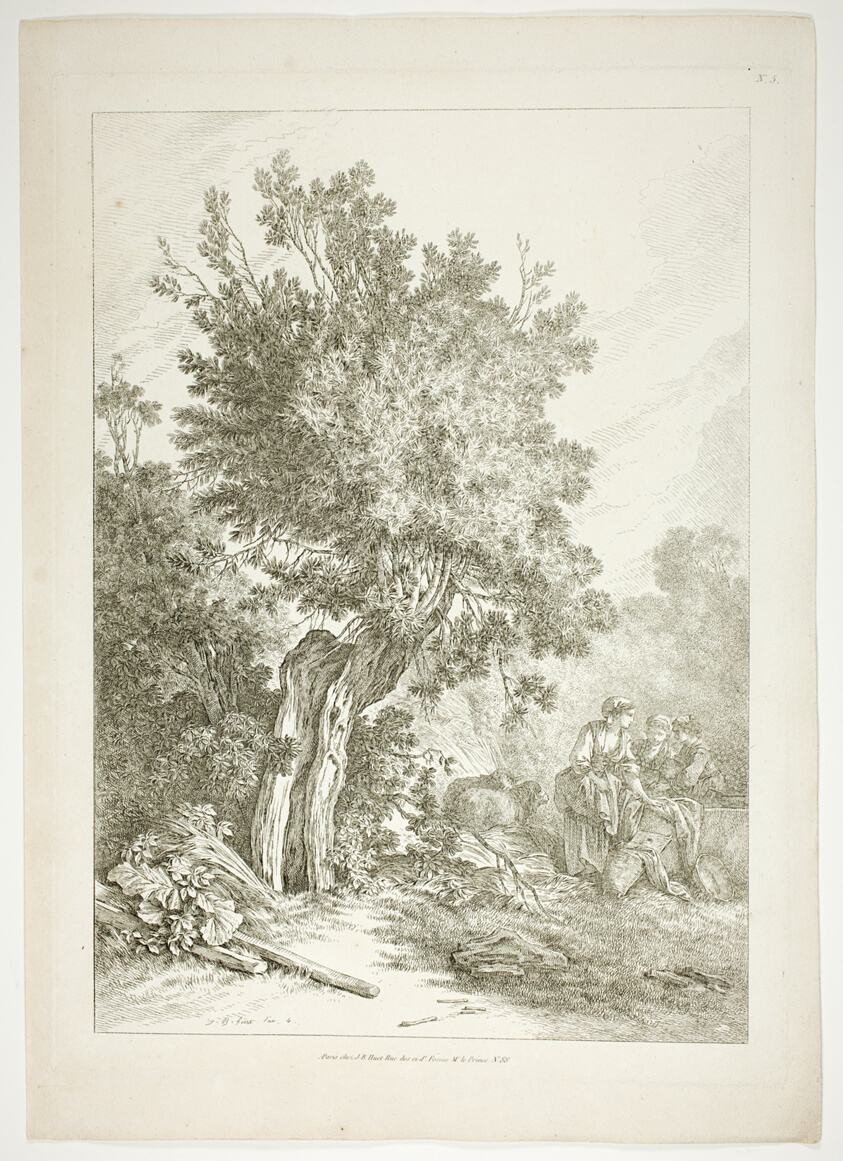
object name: Print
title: Plate Five of 38 from Oeuvres de J. B. Huet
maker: Jean Baptiste Huet (French, 1745-1811)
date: 1796–99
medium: Etching on paper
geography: France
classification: etching; print; prints and drawing